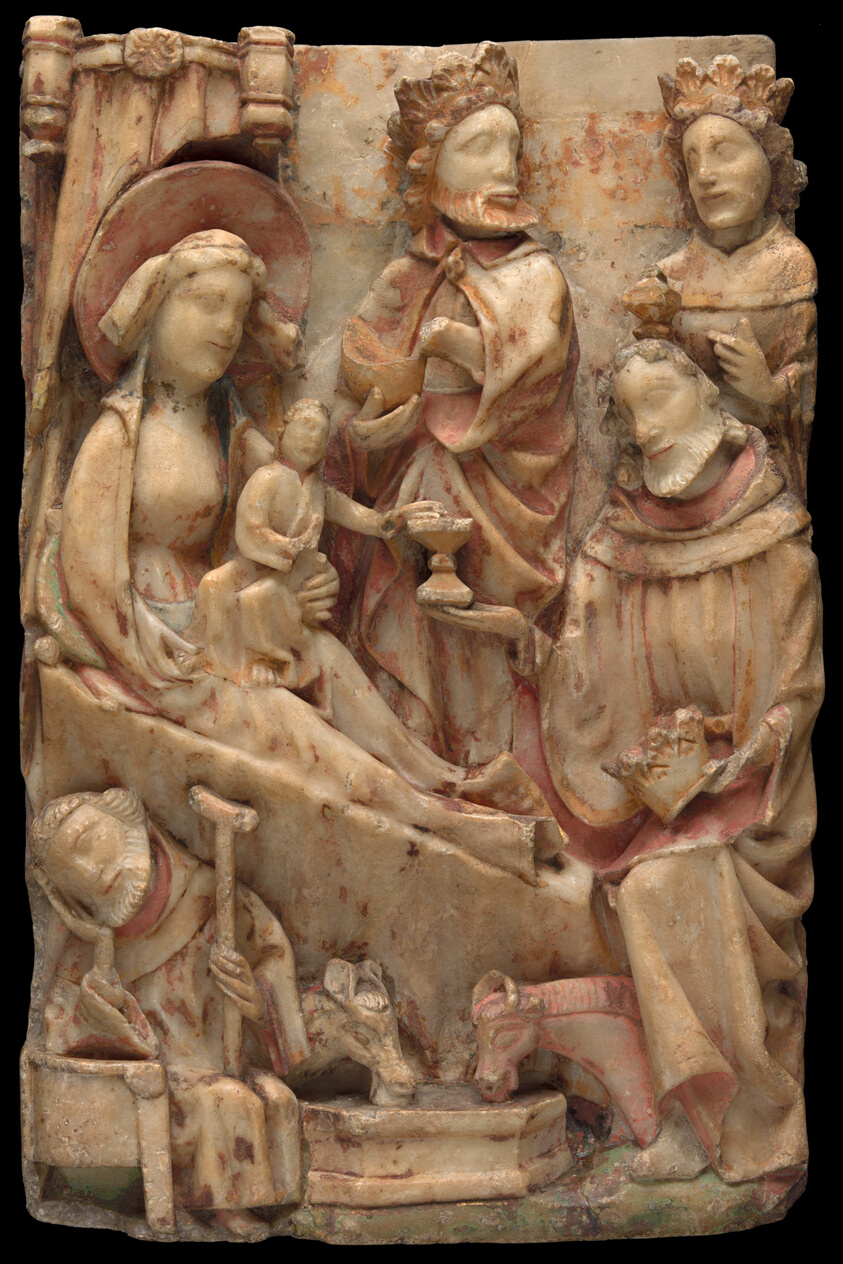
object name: Sculpture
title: Adoration of the Magi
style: 15th century, Renaissance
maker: English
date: 1425/75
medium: Alabaster with polychromy and gilding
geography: England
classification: relief; sculpture; british; sculpture/stone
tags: religious scenes, biblical, Jesus, babies, child, woman with children, women, woman, Christianity, Christian subjects, religious figures, religious, religion, Devotion, holy family, Virgin and child/Madonna and child, kings